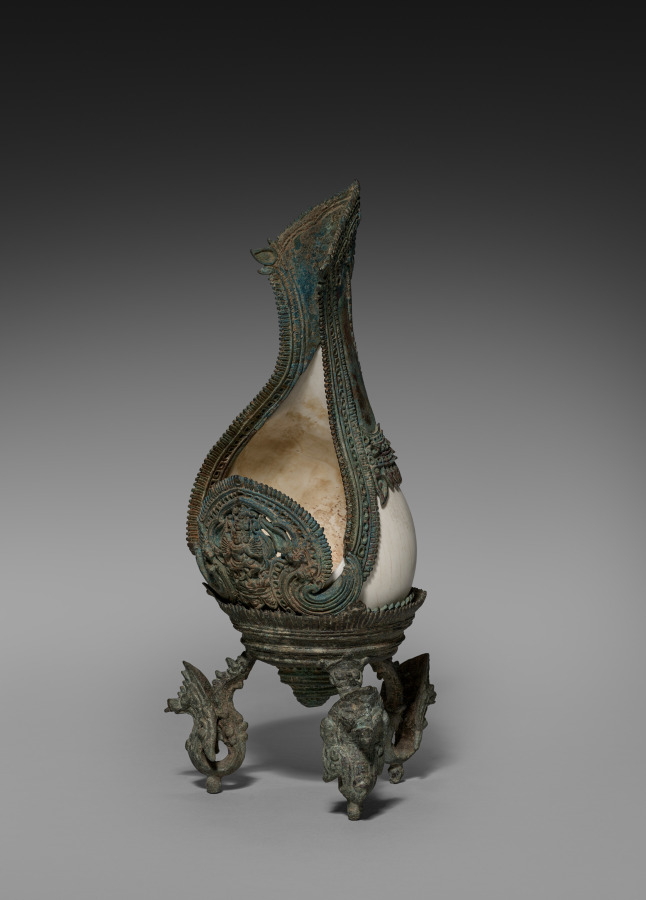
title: Conch Shell with a Figure of Hevajra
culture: Cambodia, Khmer, Angkor Period, 12th-13th Century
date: 1100s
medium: shell and bronze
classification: Sculpture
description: A royal temple like Banteay Chhmar was built for performing rituals and to honor images of gods, Buddhas, and other sacred or enlightened beings for the sake of the kingdom’s protection and ongoing prosperity. Conch shells were blown at the start of rituals to make the sound corresponding to the syllable om. The dancing figure of Hevajra, a Buddhist being of enlightenment with eight heads, sixteen arms, and four legs, has been worked into the bronze embellishment of the shell. Hevajra was elevated to a prominent position in Khmer Buddhism of the Angkorian period as the standard figure denoting the practice of rituals prescribed in a text called the Hevajra-tantra. The tripod stand with three serpents is probably not original to the shell.